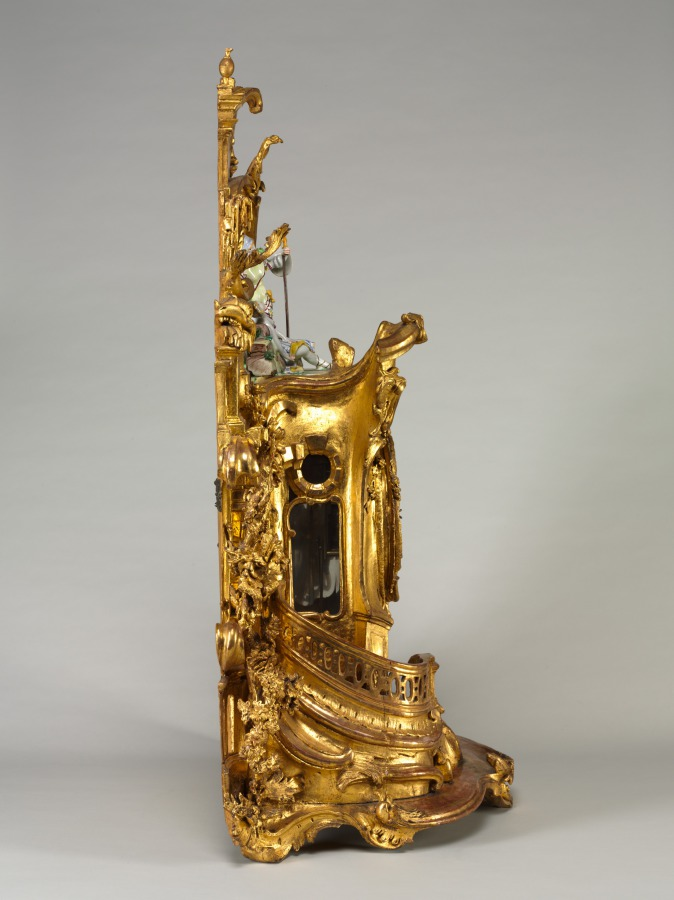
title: Clock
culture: Germany, 18th century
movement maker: Baumgartinger (German)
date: c. 1750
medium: carved and gilded wood, faience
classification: Furniture and woodwork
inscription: inscribed on face: Baumgartnger [sic] Mergentheim.